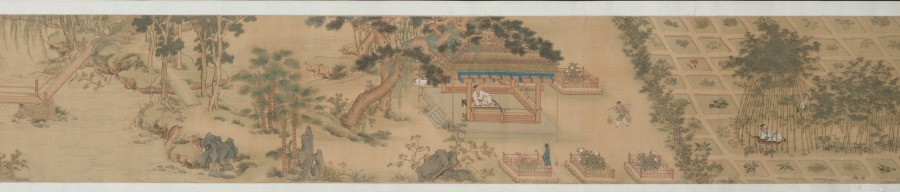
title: Garden for Solitary Enjoyment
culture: China, Ming dynasty (1368–1644)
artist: Qiu Ying (Chinese, 1494–1552)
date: 1515–52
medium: Handscroll; ink and light color on silk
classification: Painting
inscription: Accompanying text of an essay together with seven poems of Sima Guang (1019–1086) and one poem of Su Shi (1037–1101) written by Wen Zhengming (1470–1559) in 1558.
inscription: 2 colophons and 82 seals: 4 seals of Wen Zhengming 文徵明 (1470–1559); 59 seals of Xiang Yuanbian 項元汴 (1525–1590); 1 colophon, dated 1644, and 7 seals of Xiang Yukui 項禹揆 (c. late 1500s–1659); 1 colophon, dated 1880, and 2 seals of Weng Tonghe 翁同龢 (1830–1904); 2 seals of Ch'eng Chen-i (19th c.); 1 seal of Han Ch'ung (19th c.); 4 seals of Wan-go H. C. Weng 翁萬戈 (1918–2020); 3 seals unidentified.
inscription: Colophon by Xiang Yukui 項禹揆 (c. late 1500s–1659): The painting of The Garden for Self-enjoyment on the right by Shih-chou, Mr. Qiu [Qiu Ying] is in the style of Li Lung-mien. Its mood is peaceful, as if meeting the ancient gentlemen face to face among the brushes and silk; it lifts one above the sordid bustle of life. Formerly, my late father handed me this scroll which had only the painting without the written essay. I considered asking a good calligrapher to write the essay to add to it but was afraid that the quality of the writing would not match the painting. Several years later, I saw at a friend's house this essay and poems (of Ssu-ma Kuang] written by Hengshan [Wen Zhengming], once owned by my grandfather; so I spared no expense to obtain it. I rejoiced at this and said: "The divine swords are finally united. How things are pre-destined!" Now my friend Chang Kung-chao's technique for mounting [painting and calligraphy] is excellent. Therefore by daring to take them out and join them together, I can preserve this beautiful story of singular reunion. Xiang Yukui recorded at Hai-yeh-t'ang [hall] two days before New Year's Eve in the jiasheng year of the Chongzhen era [1644]. trans. LYSL/HK/WKH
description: Garden of Solitary Enjoyment refers to a site built in 1073 by the statesman Sima Guang (1019–1086) after he had retired to Luoyang, Henan province. Every spring, visitors would flock to his garden. Each of its seven structures references a historic figure. Sima wrote: I channel streams [like Du Mu], to water flowers [like Bai Juyi], or trim bamboo [like Wang Huizhi]. . . . I know of no joy between heaven and earth that could take its place. Qiu Ying’s painting, created after an 11th-century version of the same theme, must have appealed to garden owners of the Ming dynasty, since it became the template for numerous Suzhou workshop copies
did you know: Sima Guang completed his monumental survey of Chinese history, Zizhi tongjian, in the garden depicted in this painting.